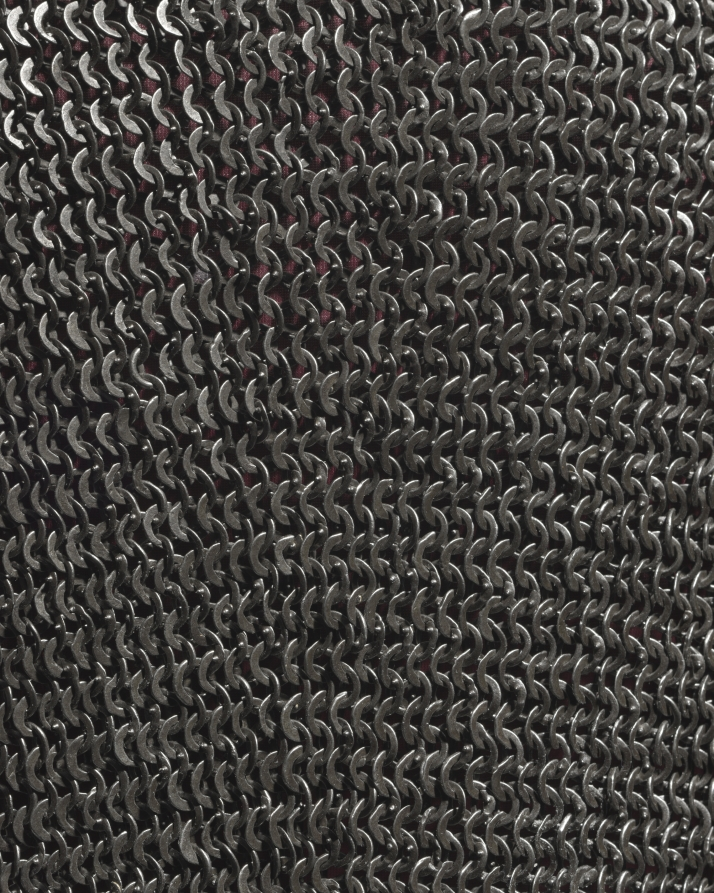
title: Hauberk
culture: Germany (?)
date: c. 1400–1450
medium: steel and brass rings, riveted with modern buckles and straps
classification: Arms and Armor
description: Mail armor was the predominant form of metal body defense for European knights until about 1350. The term derives from the Old French word maille (mesh), implying a protective textile. Each mail garment was constructed of small linked metal rings and "woven" for a specific part of the body. Mail for the torso is a hauberk and typically reached mid-thigh.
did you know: Mail was expensive to make and generally only available to warriors of noble birth unless it could be obtained as war booty.